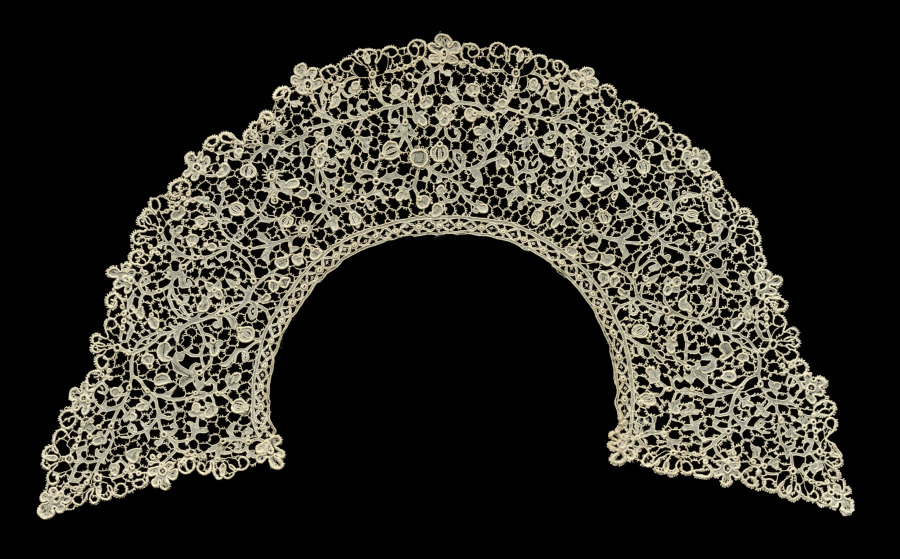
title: Lace Collar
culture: Italy, Venice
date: 1600s–1700s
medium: linen: needle lace (Venetian Rose Point)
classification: Lace